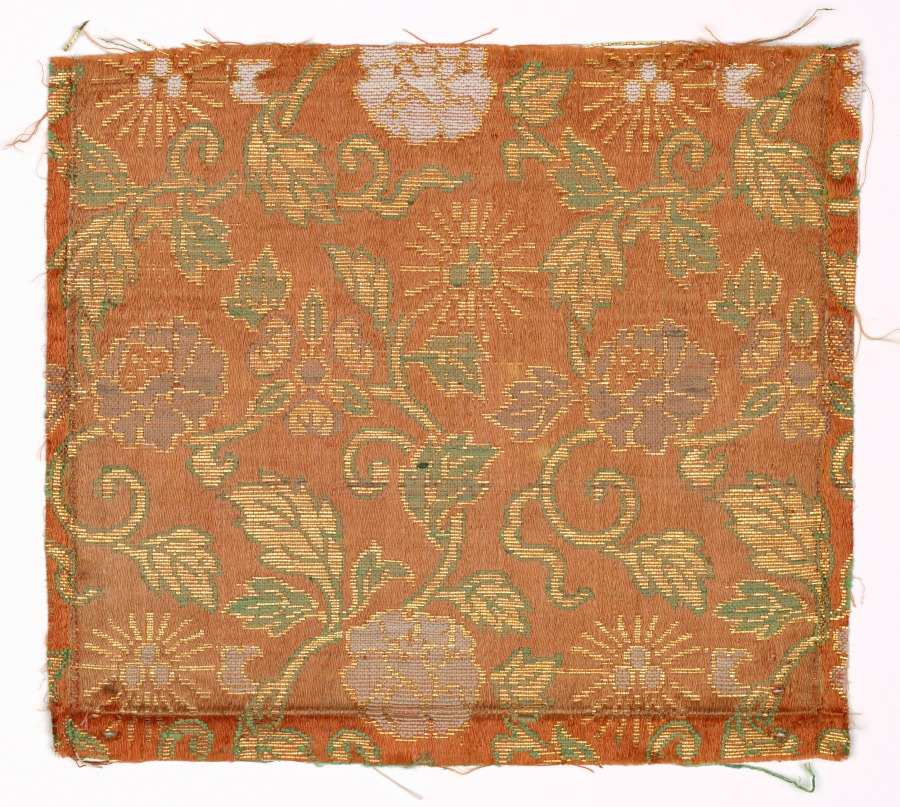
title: Textile Fragment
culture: Japan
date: 1800s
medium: silk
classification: Textile